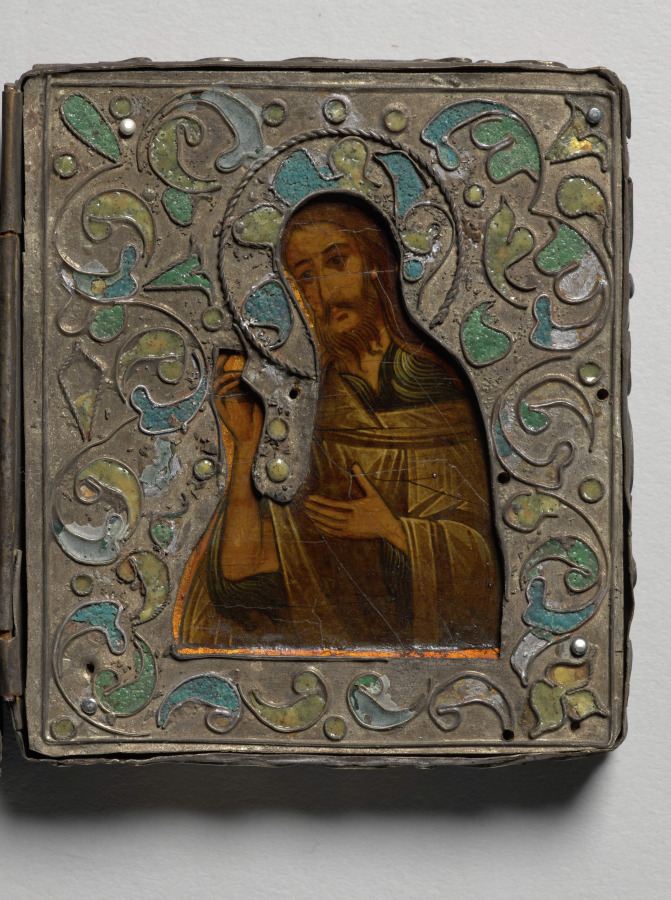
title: St. John the Evangelist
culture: Russia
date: 1800s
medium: pigment on wood, in cloisonné enamelled insert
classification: Painting